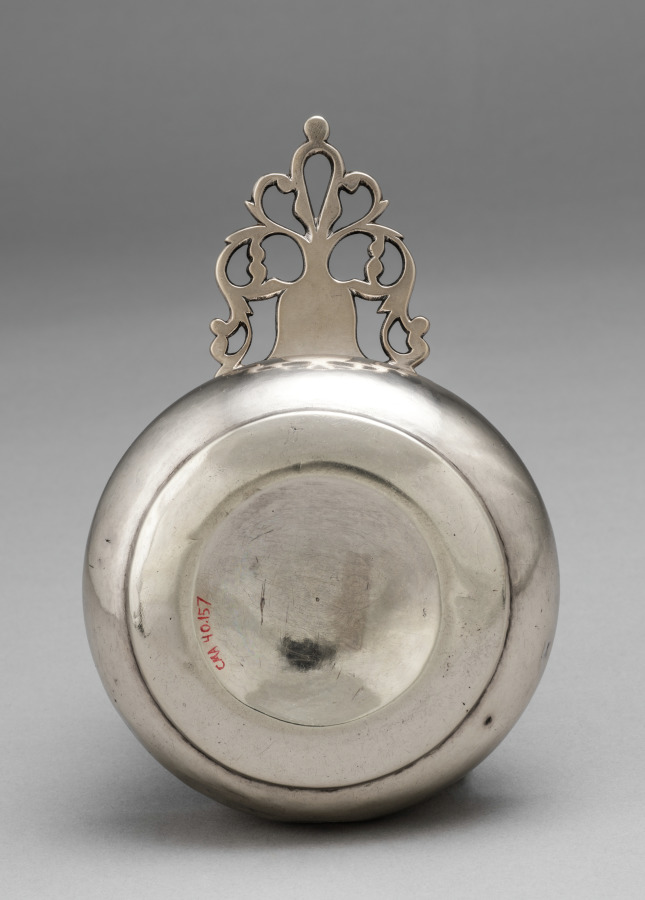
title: Porringer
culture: America, Massachusetts, Boston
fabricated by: Benjamin Burt (American, 1729–1805)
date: c. 1750–1800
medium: silver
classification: Silver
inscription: engraved "W" over "C=M" in block letters below mark on top of handle.